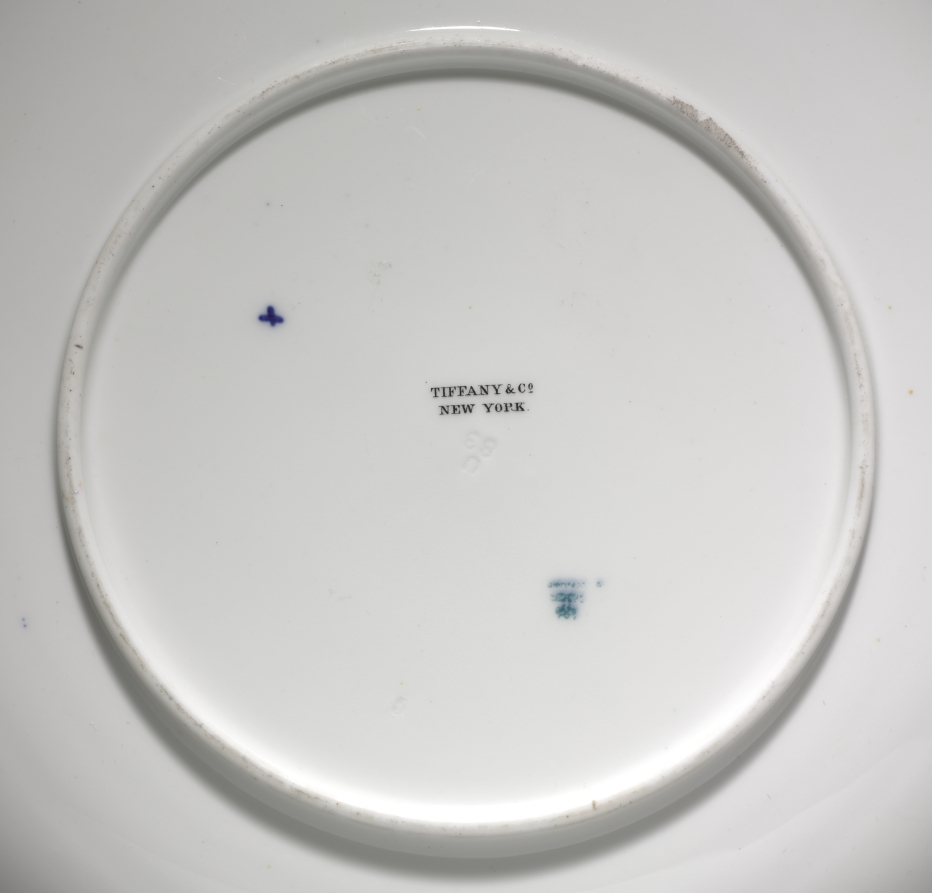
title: Cabinet Plate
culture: America, New York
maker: W. T. Copeland & Sons (British)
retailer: Tiffany & Co. (America, New York, est. 1837)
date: 1883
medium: porcelain with enamel pâte-sure-pâte and gilt decoration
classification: Ceramic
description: Pate sur pate or 'paste on paste' is a decorative technique for porcelain that involves painting primarily white clay slips on a dark background. After each layer has dried, successive layers are applied before being scraped and carved back to form the decoration in low relief.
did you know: W. T. Copeland was a British businessman and politician who served as Lord Mayor of London and a Member of Parliament.